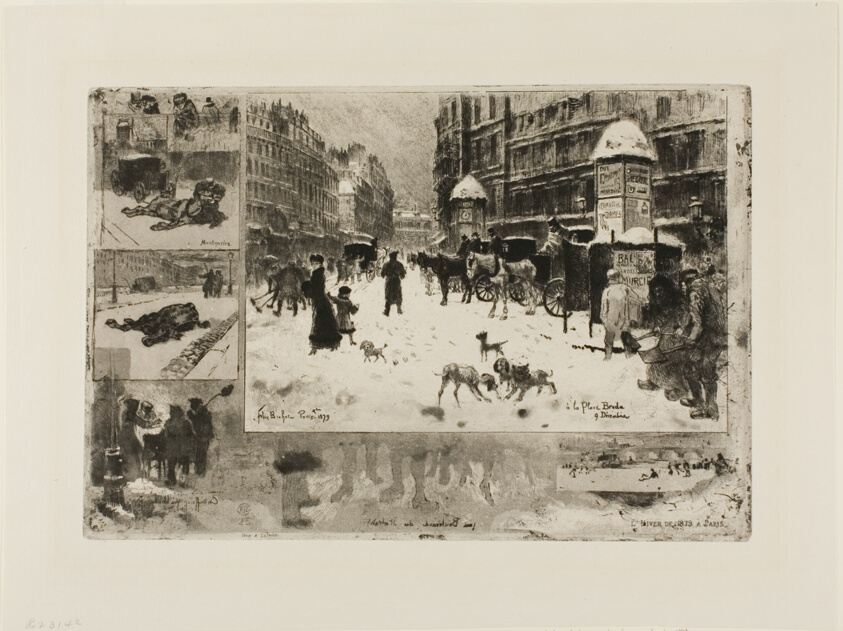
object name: Print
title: Winter in Paris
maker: Félix Hilaire Buhot (French, 1847-1898)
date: 1879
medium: Etching, roulette and aquatint on cream laid paper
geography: France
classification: etching; print; prints and drawing